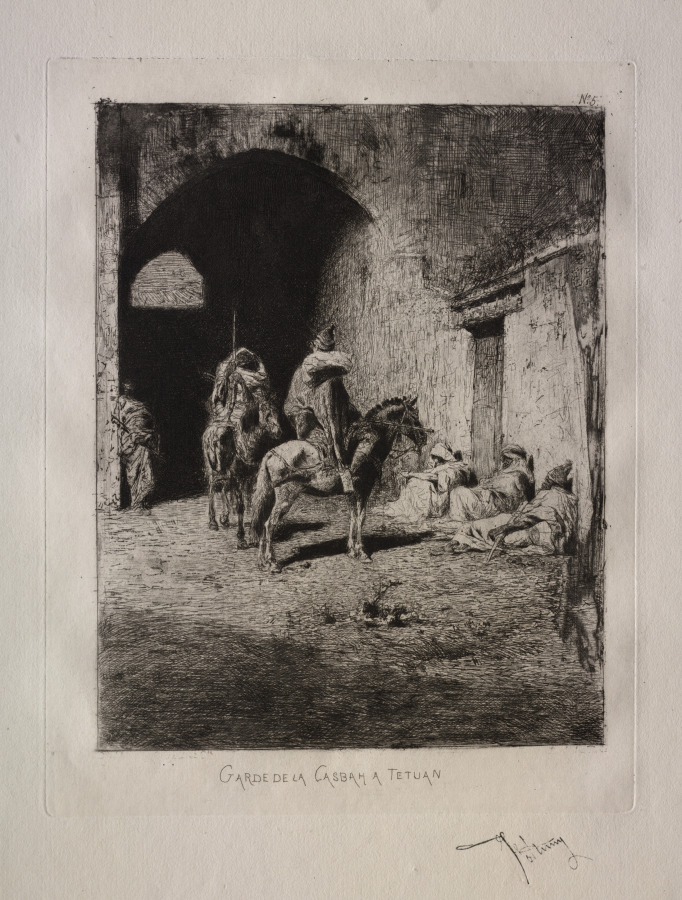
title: Guard of the Casbah at Tétouan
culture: Spain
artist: Mariano Fortuny (Spanish, 1838–1874)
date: c. 1873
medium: etching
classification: Print